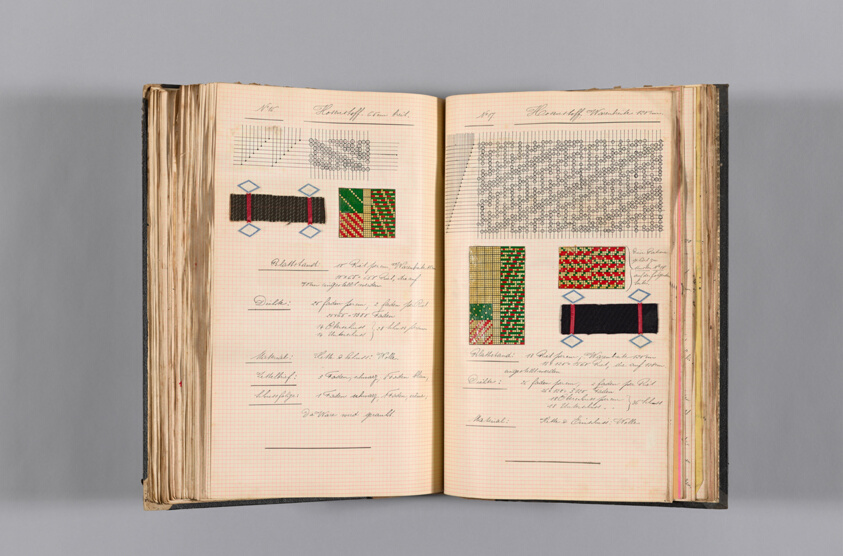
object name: Book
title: Student Notebook Containing Notes, Diagrams and Swatches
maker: Alfred Fehr (Switzerland, 1879-1955)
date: c. 1898–1900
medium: Bound notebook of technical notes and weave samples: fabrics for clothing and mixed goods, ribbed and twill cottons, and jacquard; 176 pages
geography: Germany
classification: book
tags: weaving, diagrams